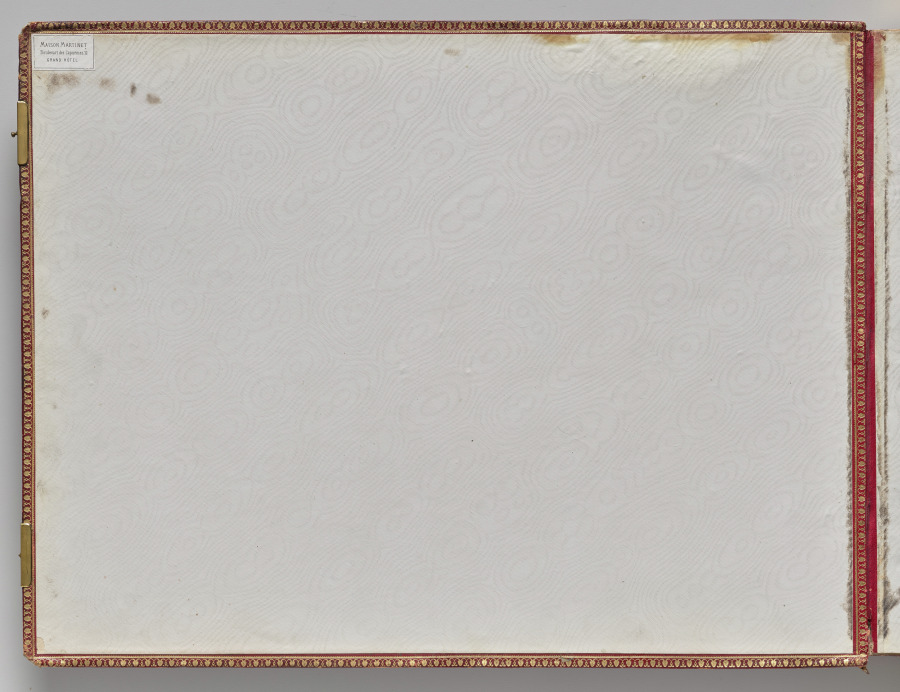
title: Photographs of Northern India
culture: England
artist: Samuel Bourne (British, 1834–1912)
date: 1863–70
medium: Album of 50 albumen prints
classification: Bound Volume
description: The 50 images in this album, all taken in the 1860s, move from the hill towns of the Himalayas down to cities including Lahore (now in Pakistan), Delhi, Lucknow, Agra, Benares (now Varansi), and Calcutta (now Kolkata). Architectural studies of major monuments offer valuable historical records of what sites such as the Taj Mahal and the imperial mosque of the Mughal emperors in Delhi looked like before twentieth-century restorations.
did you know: Samuel Bourne, the author of most the images in this album, was a banker in England before he moved to India to become a professional photographer.